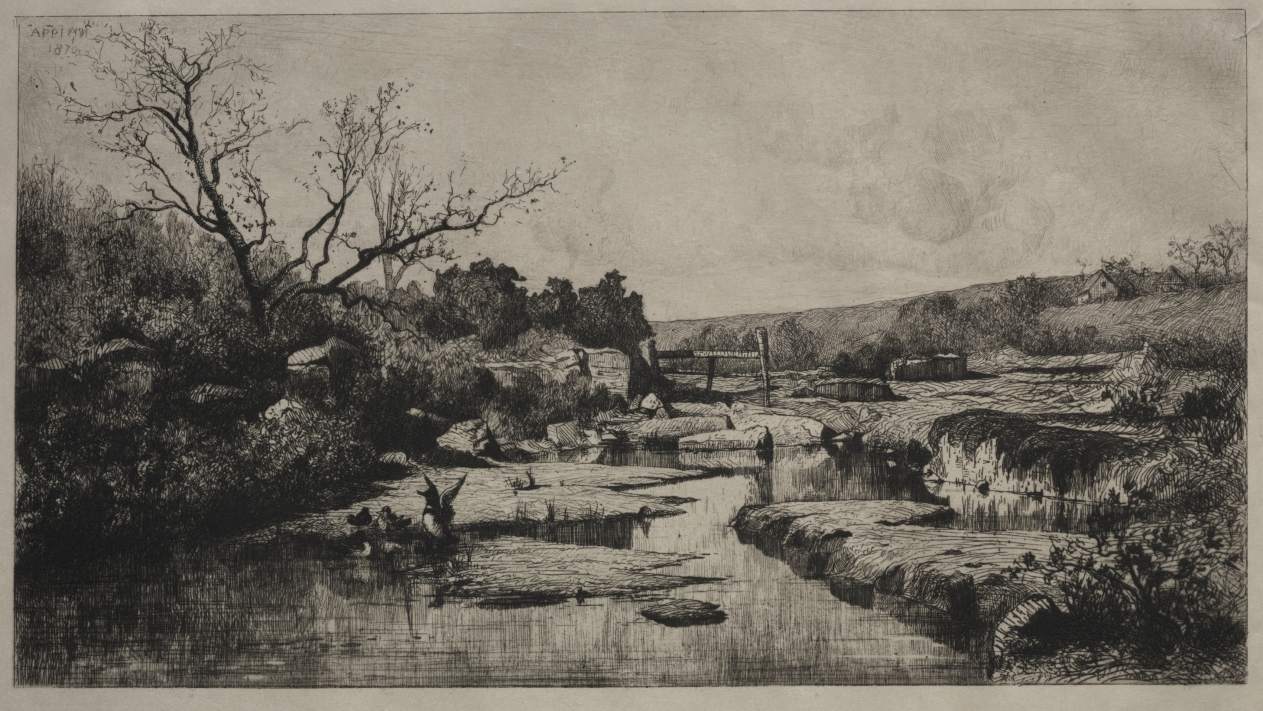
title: Source of the Albarine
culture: France, 19th century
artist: Adolphe Appian (French, 1818–1898)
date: 1870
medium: etching and drypoint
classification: Print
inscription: upper left, in plate: Appian 1870